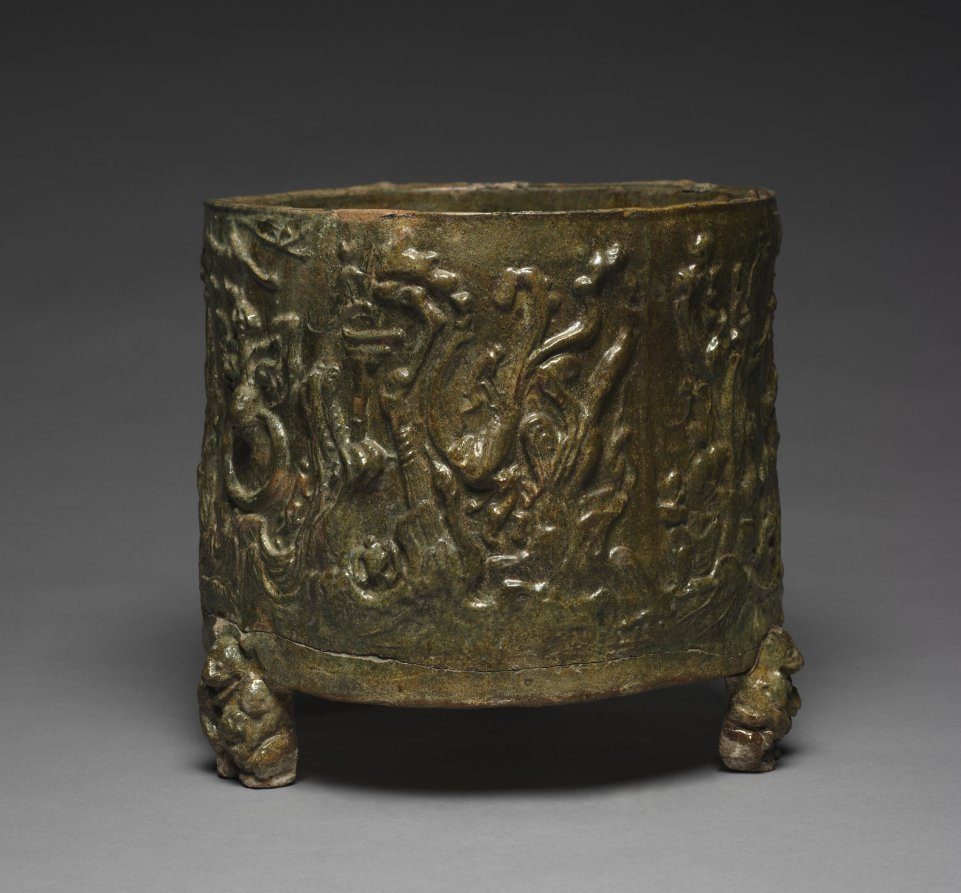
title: Cylindrical Jar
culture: China, Han dynasty (202 BCE–220 CE)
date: 202 BCE–220 CE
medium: lead glazed earthenware with molded relief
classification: Ceramic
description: Vessels like this often are call "hill jars" since many survive with conical covers shaped in rising peaks. "Squatting bear" feet and false animal-mask ring handles are common to the group. This cylinder has been molded in two relief bands depicting hills and three populated with a medley of real and imaginary creatures. Wispy human-like figures are associated with a popular cult of Taoism prevalent in China during the Han Dynasty. The scene may represent a paradise of immortality idealized by that cult and appropriate to this vessel's offering as a burial gift. When excavated from Han tombs, similar jars have been found to hold animal bones or powder; they may have served as food or cosmetic containers. Regardless of symbolism or function, this piece provides evidence for the appearance of early landscape lost in more fragile media.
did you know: The three feet are in the form of seated bears holding cubs.